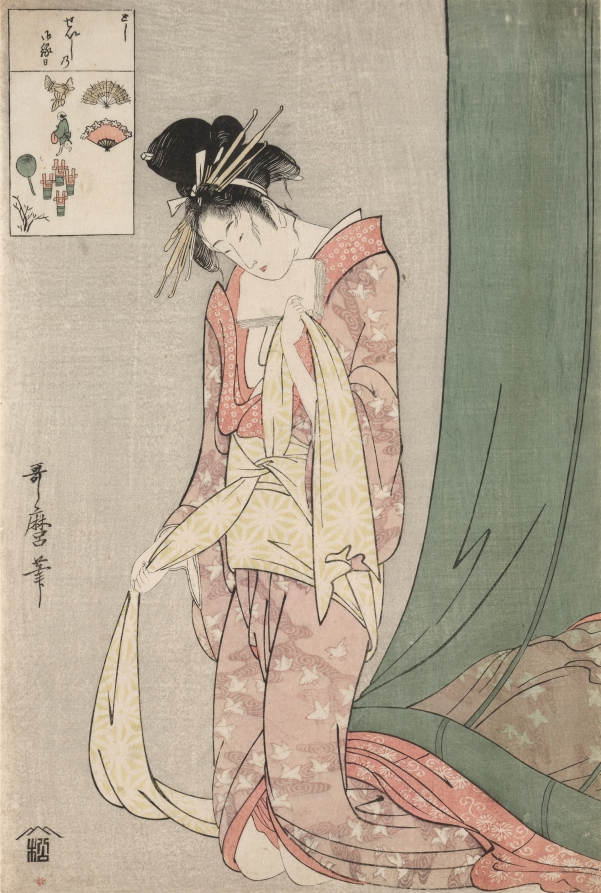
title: Hanaōgi of Ōgiya from the series Picture Puzzles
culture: Japan, Edo period (1615–1868)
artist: Kitagawa Utamaro (Japanese, c. 1754–1806)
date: c. 1797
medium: Color woodblock print; ink and color on paper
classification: Print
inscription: Signature: Utamaro hitsu. Publisher: Matsumuraya Yahei (emblem).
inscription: Collector's Seal: Vever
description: In this tricky print, one must decode the small pictures in the rectangle at the upper left corner to learn the identity of the subject of the print: a woman whose name means "Flower Fan," her place of work called the "House of Fans," and what she is doing—emerging from a mosquito net.